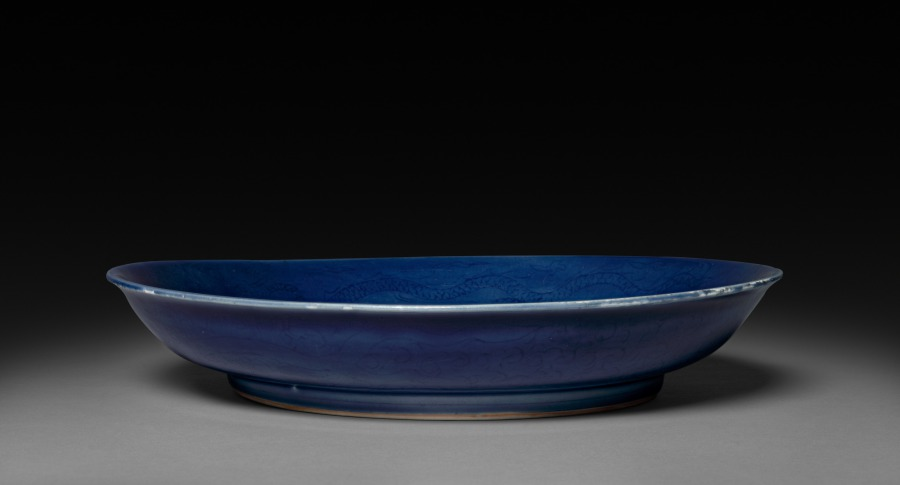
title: Dish with Dragon and Clouds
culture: China, Jiangxi province, Jingdezhen kilns, Ming dynasty (1368-1644), Jiajing mark and reign (1522-66)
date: 1522–66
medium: porcelain with incised and underglaze blue decoration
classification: Ceramic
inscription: 大明嘉靖年製